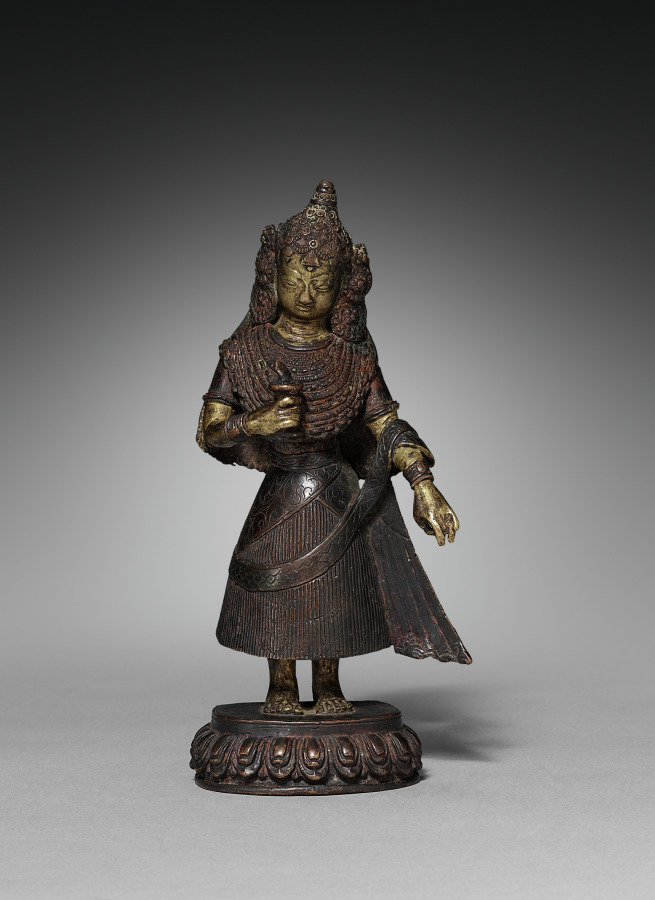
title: Royal Female Donor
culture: Nepal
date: c. 1500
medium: bronze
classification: Sculpture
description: Carrying a lamp in one hand, this female figure draped in finery was probably included as the donor of a sculptural group. She wears a complex headdress consisting of a network of beads and plaques joined together, ending in a bell at her forehead and crowning a long cloth that reaches to her waist. Her position on a lotus flower may indicate the transcendent state she attained as a result of the karmic merit of her donation.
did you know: The pleated skirt tied with a scarf around her waist is characteristic of Nepal.